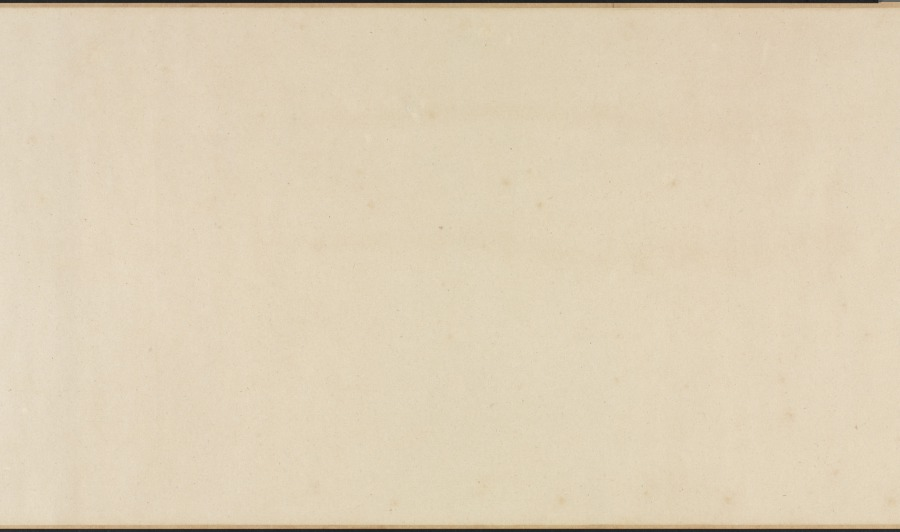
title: Water Village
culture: China, Ming dynasty (1368–1644)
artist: Wen Boren (Chinese, 1502–1575)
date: 1570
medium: handscroll; ink and light color on paper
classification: Painting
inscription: 隆慶庚午秋仿趙文敏筆. 五峰文伯仁 [印] 五峰山人; 文伯仁印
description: In the autumn of 1570, Wen Boren painted this seemingly unemotional scene of low-lying marshlands with a chain of rounded mountains in the background. A fishing boat is nestled on the shore near the village. Although paths and bridges traverse the landscape, only two people are visible in the stillness. From the restrained atmosphere of this landscape, one would never guess that Wen Boren was known as the “bad boy” of the Wu School for his explosive temper. As a younger man, he was even embroiled in a contentious lawsuit with his own uncle, Wen Zhengming (1470–1559), a master of Ming dynasty painting with whom he had trained. The ideal of the scholar-painter, or literati, was that an artist’s moral character is reflected in his paintings, so there was great incongruity between Wen Boren’s difficult personality and his restrained landscapes. A contemporary, Wang Shizhen, wrote this about him: "This gentleman is prone to behave odiously and screamed accusations at people. How is it possible for him to carry in his bosom such a wealth of scenic wonders?" Who knows what effort it took to subdue his fractious spirit to project an image of coolness and refined taste in his paintings?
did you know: A foreground tree has an eccentric twisting silhouette and pepper-dot "halo" of leaves.